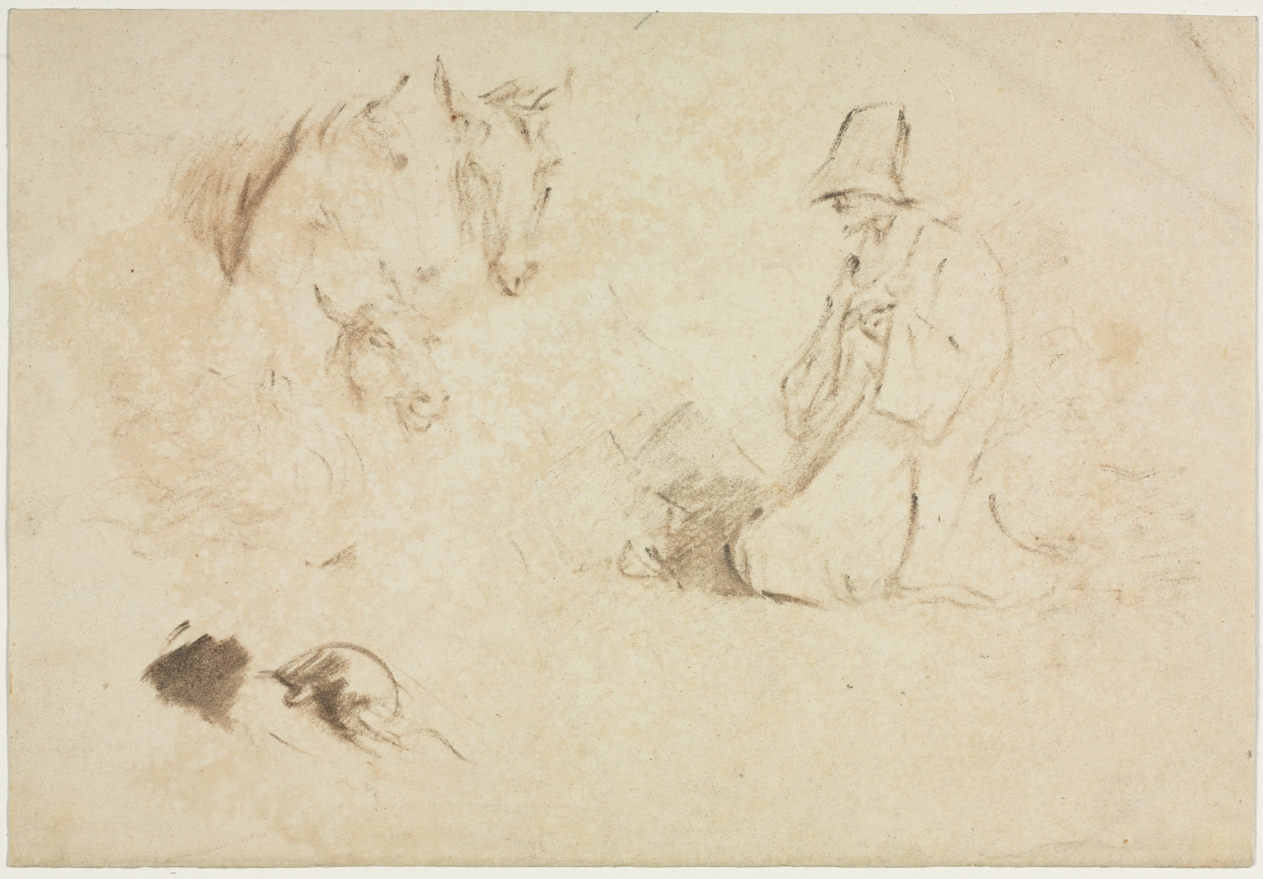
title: Sketches: Figures and Animals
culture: England, 18th century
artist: Thomas Gainsborough (British, 1727–1788)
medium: brush and brown ink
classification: Drawing